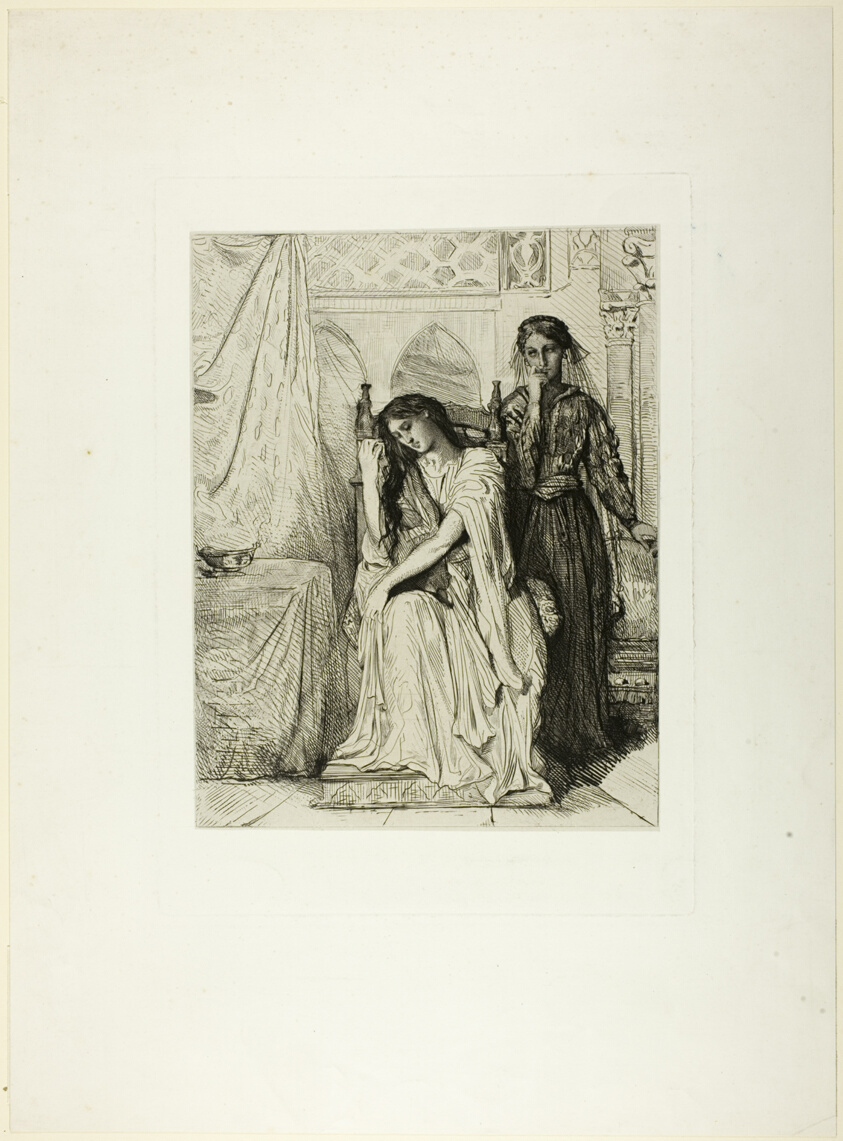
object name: Print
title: The Willow Song, plate nine from Othello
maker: Théodore Chassériau (French, 1819-1856)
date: 1844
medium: Etching, engraving, roulette, drypoint on off-white China paper, laid down on white wove paper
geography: France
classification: etching; print; prints and drawing